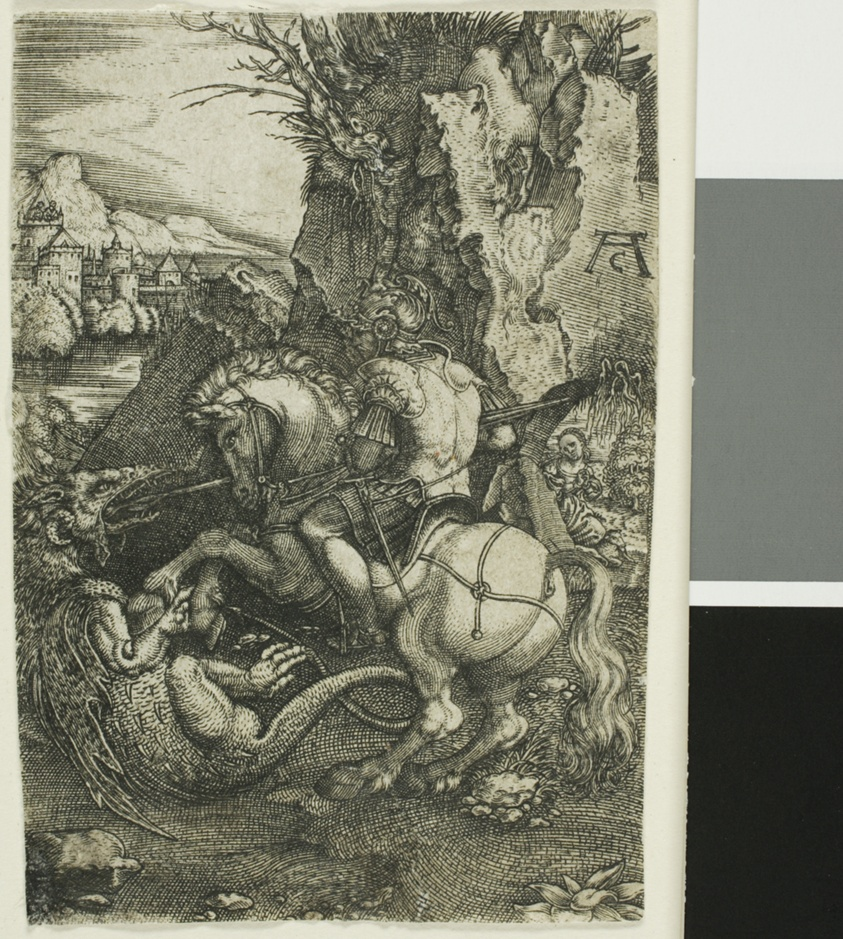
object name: Print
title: St. George on Horseback, Killing the Dragon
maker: Allaert Claesz; Netherlandish, c. 1500-1555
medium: Engraving on ivory laid paper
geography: Holland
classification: engraving; print; prints and drawing